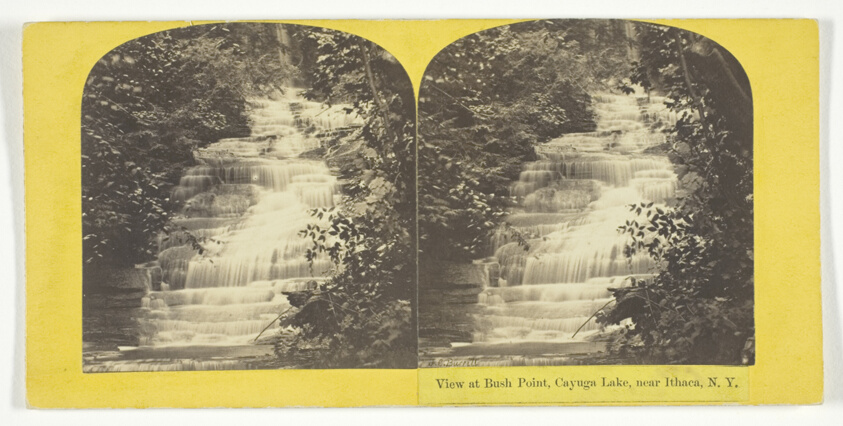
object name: Photograph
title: View at Bush Point, Cayuga Lake, near Ithaca, N.Y.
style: 19th century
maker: J. C. Burritt; American, active 1860s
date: 1860/65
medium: Albumen print, stereo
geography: Ithaca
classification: photography; photograph; albumen silver print; stereograph (albumen)